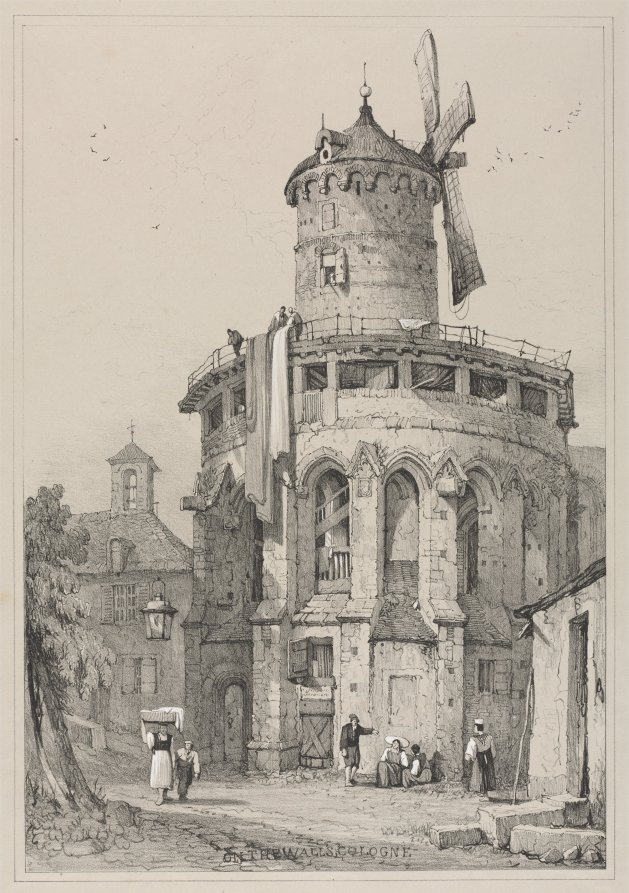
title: Facsimiles of Sketches Made in Flanders and Germany: On the Walls, Cologne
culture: England, 19th century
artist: Samuel Prout (British, 1783–1852)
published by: Charles Joseph Hullmandel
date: 1833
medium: lithograph, hand colored with white gouache on gray paper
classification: Print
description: Prout was a landscape watercolorist, printmaker, and well-known teacher. Prout drew freely on the stone with a firm but crumbling line, ideally suited to the quaint, eroded architecture he loved to portray. Tone was obtained by printing on pale gray paper and then adding highlights by hand with white gouache. Topographical prints had been popular in England since the late 1900s and they increased awareness of the beauty of the British landscape. Such prints, as well as the writing of Jean Jacques Rousseau, inspired a love of nature. When the Napoleonic Wars ended in 1814, peaceful conditions enabled people to travel, leading to the production of lithographic scenes from Europe. These were most often published in sets, sometimes with accompanying text, through which patrons could vicariously satisfy their wanderlust.